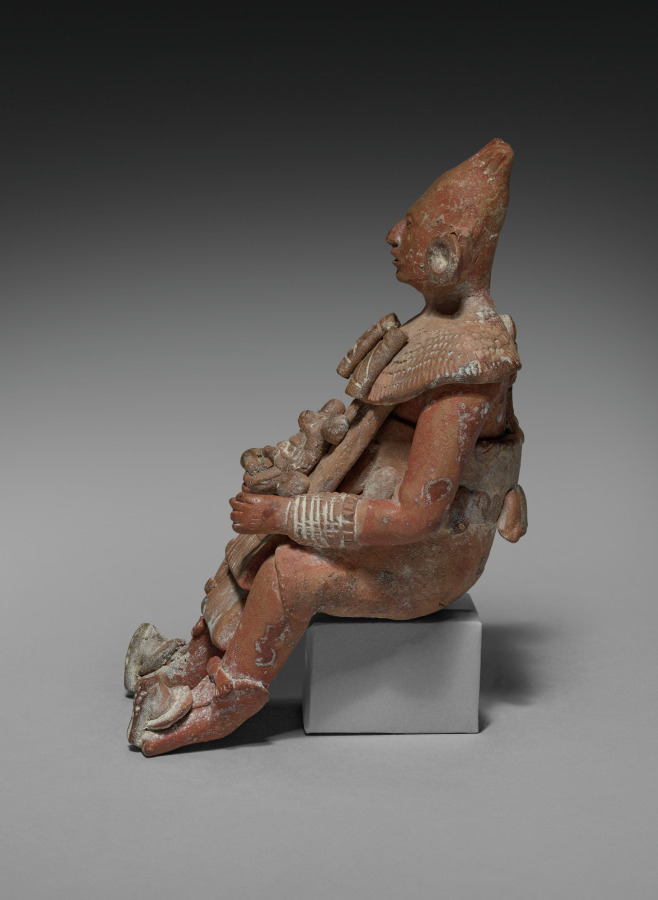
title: Seated Lord with Removable Headdress: Figure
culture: Mesoamerica, Maya, probably Jaina Island, Late Classical period, 7th-9th century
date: 600–800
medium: ceramic and slip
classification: Ceramic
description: The major Maya grave offerings on Jaina Island were ceramic figurines that depict deities and humans in a variety of roles. The seated figure represents a male, perhaps another warrior, who wears a huge zoomorphic headdress. A skeletal face with articulated jaw descends from the headdress to fit as a mask over the figure’s face.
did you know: It is estimated that some 20,000 people were buried on the tiny island of Jaina over a 500-year period.